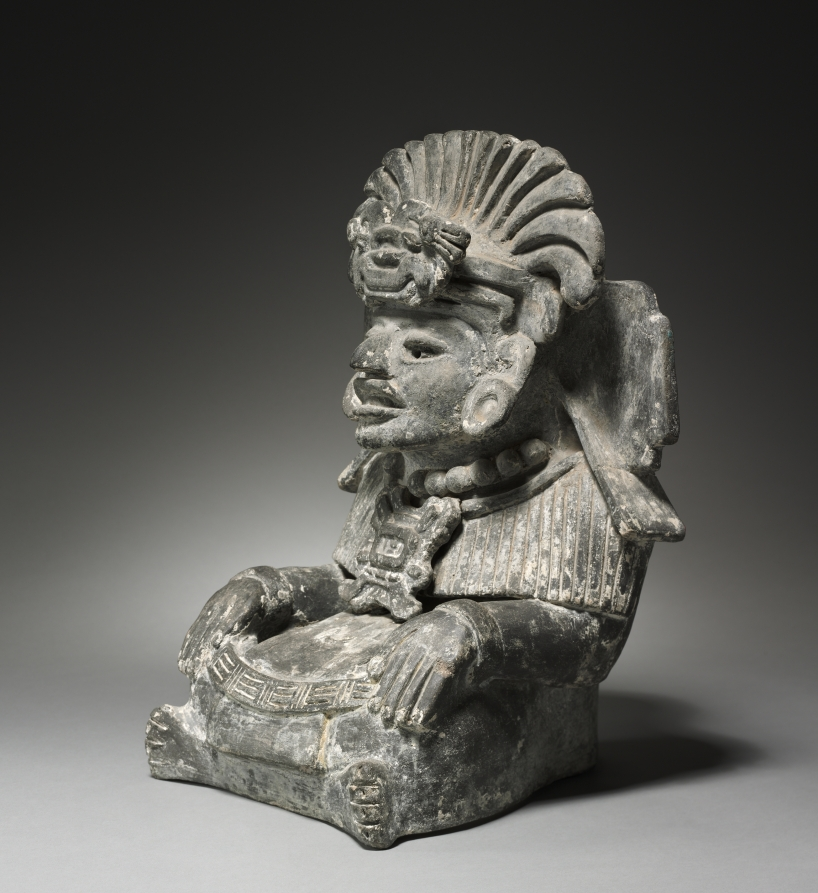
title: Effigy Urn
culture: Mexico, Zapotec, Monte Albán IIIB style, 20th century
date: 1900s (Thermoluminescence date, after 1930)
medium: gray pottery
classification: Sculpture